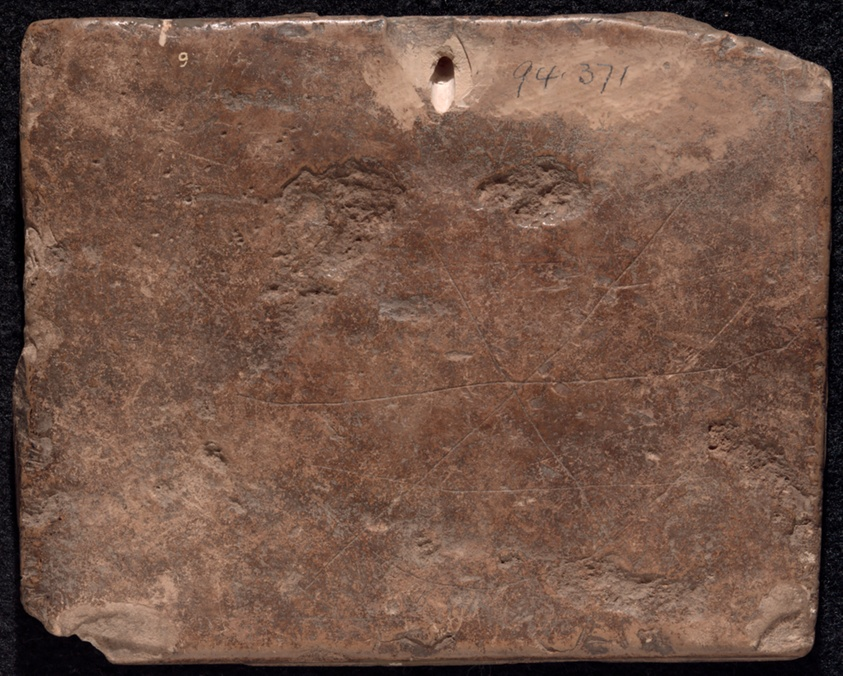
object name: Architectural fragment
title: Relief of a Bull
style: ptolemaic, egyptian, ancient, greco-roman (egyptian)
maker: Egyptian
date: Early Ptolemaic Period, about 300 BCE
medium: Limestone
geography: Egypt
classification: plaque (flat object); stone; sculpture; ancient art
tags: bull, animals, bulls